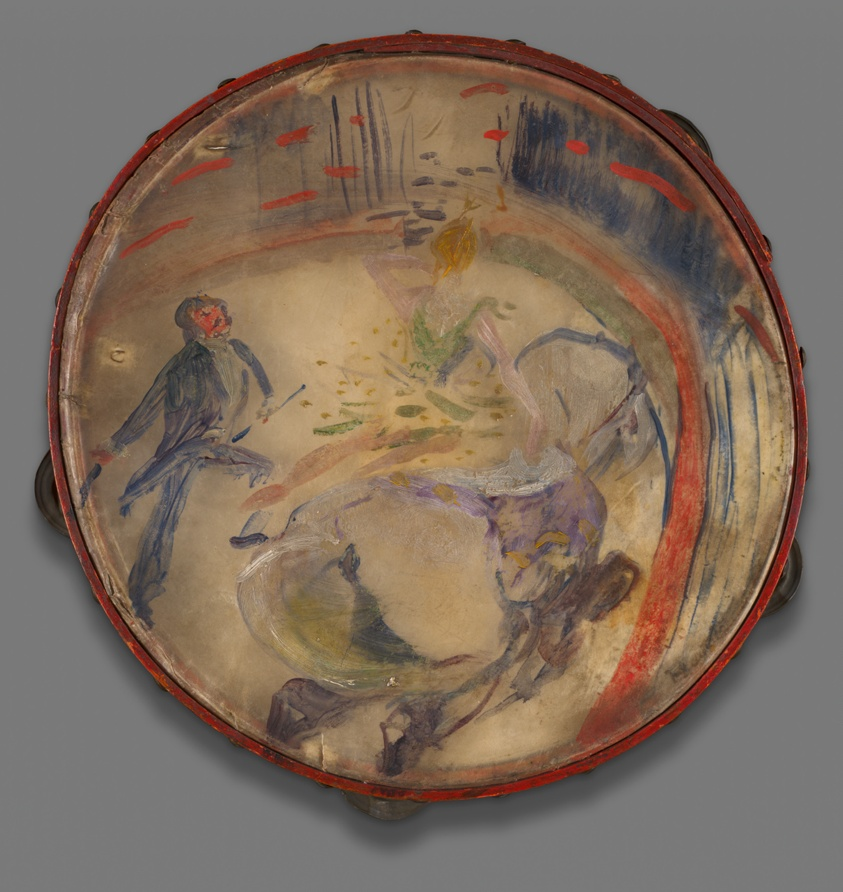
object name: Painting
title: At the Circus: The Bareback Rider (Au Cirque: Écuyère)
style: Post-Impressionism, nineteenth century, 19th century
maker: Henri de Toulouse-Lautrec (French, 1864–1901)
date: 1888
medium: Tambourine with oil on vellum painting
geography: France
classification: musical instrument; paint; oil paintings (visual works); french; painting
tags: performance, woman, performers, music, man, instruments, horse, circuses, animals, musical instruments